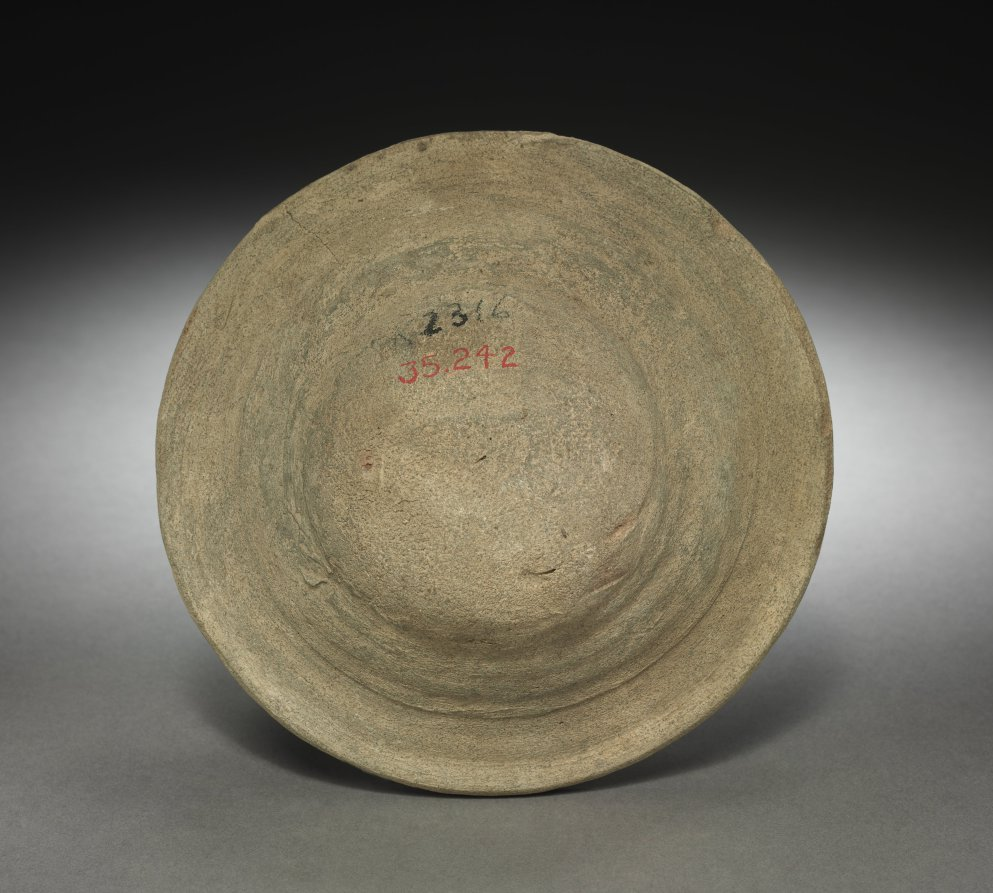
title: Bowl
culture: Iran, Sasanian Empire (224–651 CE)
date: 222–650 CE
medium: earthenware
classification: Ceramic